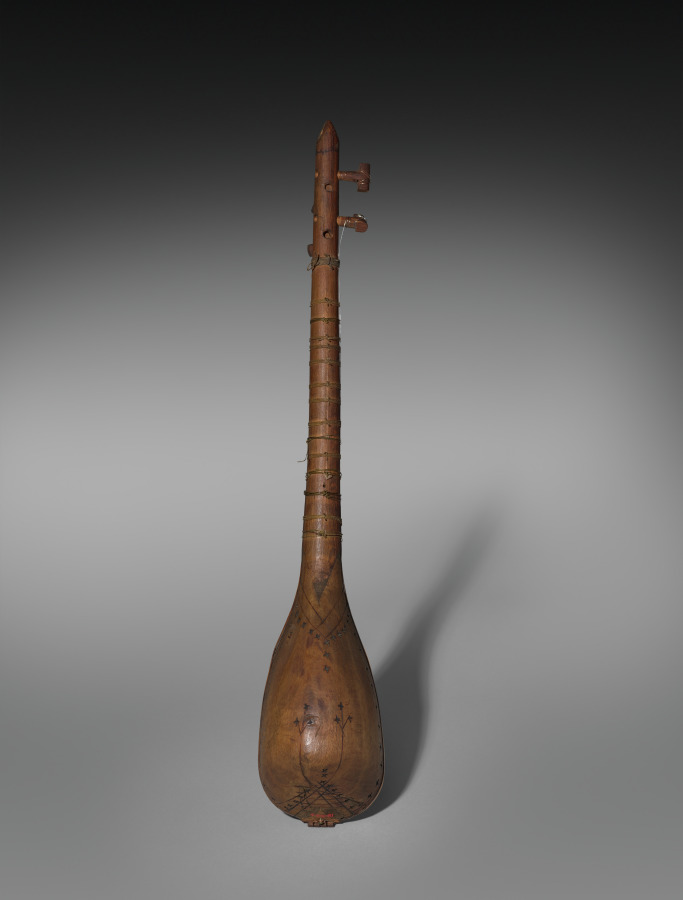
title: Tanbūr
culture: Syria or Turkey, Ottoman period (1299–1922)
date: late 1800s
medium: Wood, bone, mother-of-pearl, and wire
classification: Musical Instrument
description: This long-necked lute collected in Ottoman Syria possesses traits that are Syrian, Turkish, and Iranian and provides an example of the musical interaction between cultures. It is an ancient instrument and resembles lutes used in Pharaonic Egypt and Mesopotamia. In its many forms, the tanbūr was a common instrument throughout the Islamic world. It is often used as a solo instrument in both sacred and secular contexts. Burn marks decorate the pear-shaped body along with inlaid dots of mother-of-pearl, which may also have helped with navigation of the fret board by the player.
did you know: The two pairs of wire strings would be played with a quill plectrum.